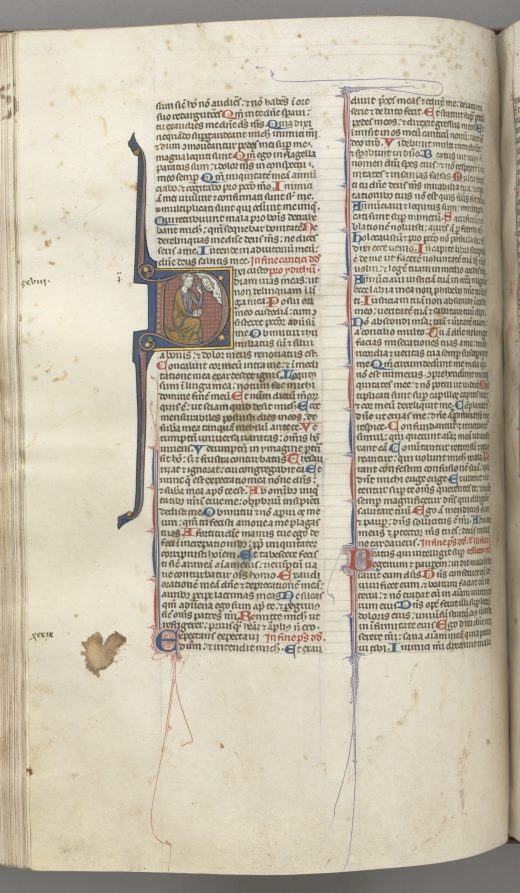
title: Fol. 220v, Psalm 38, historiated initial D, David kneeling, gesturing to the bust of God above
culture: Southern France, Toulouse(?), 13th century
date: c. 1275–1300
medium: ink, tempera and gold on vellum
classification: Bound Volume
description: Biblical manuscripts were highly prized and important possessions of churches, monasteries, cathedral schools, and universities throughout medieval Europe. The biblical texts were known as the vulgate, the translations made by Saint Jerome in the fourth century from Hebrew and Greek into Latin, which became the definitive and official Latin version of the Roman Church. In the 13th century, the bible was, for the first time, produced as a single volume with an officially sanctioned sequence to its books and chapters as illustrated by this example. The very extensive decoration of this bible is arranged hierarchically to indicate the relative importance of the various texts so that full or almost full-page initials mark the openings of the first prologue, Genesis, and the first Gospel; historiated initials mark the beginning of each book and illuminated initials mark the Prologues.